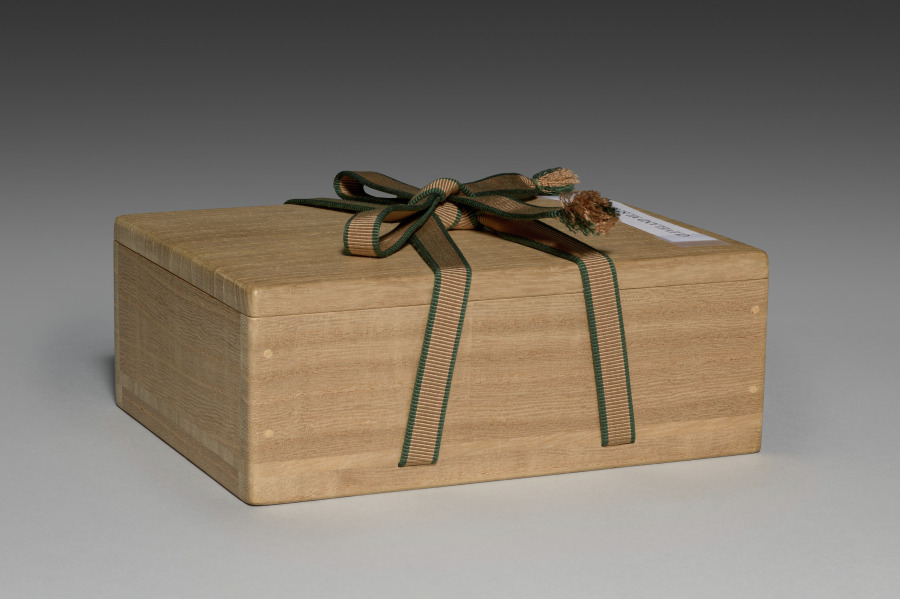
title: Ginkgo Leaf-Shaped Small Dish (Kozara) with Stylized Key-Fret Design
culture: Japan, Edo period (1615–1868)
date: mid-1600s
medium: Porcelain with molding and overglaze color enamel (Hizen ware, Matsugatani kilns, Nabeshima type)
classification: Ceramic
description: This dish combines a precisely molded shape with a freehand design in overglaze color enamels.